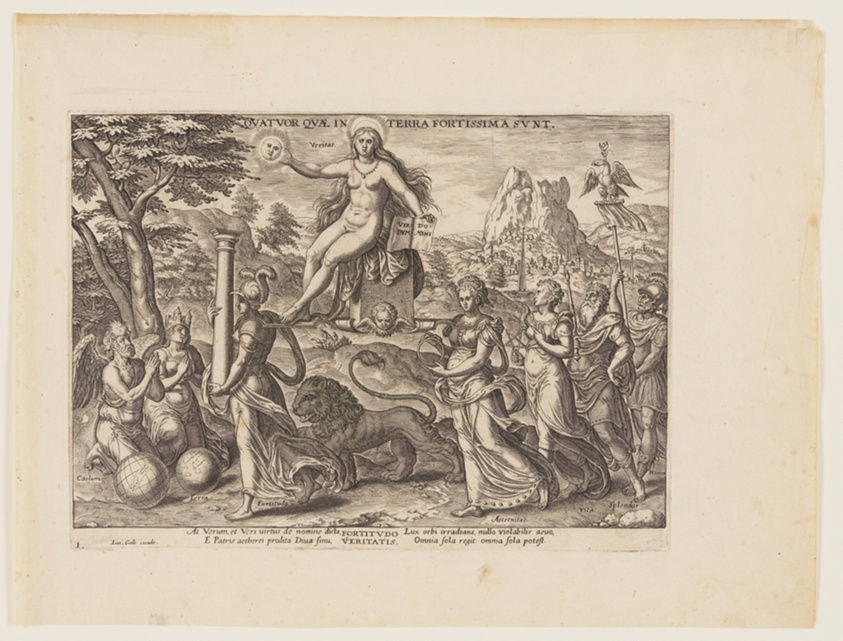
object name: Print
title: The Power of Truth [3 Esdras 4:36, 38], from The Four Strongest Powers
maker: Philips Galle (Flemish, 1537–1612); after Gerard van Groeningen (Netherlandish, active Antwerp, 1563-73)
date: 1574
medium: Engraving on ivory laid paper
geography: Flanders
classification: engraving; paper; print; prints and drawing